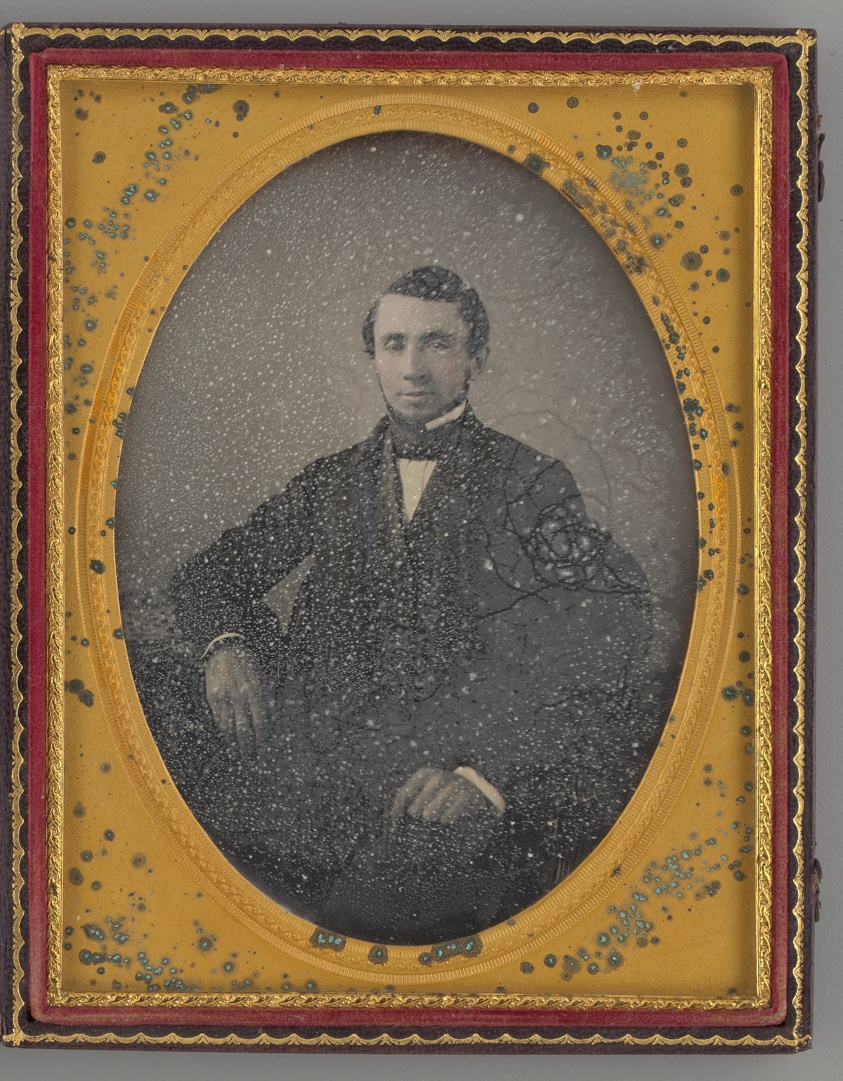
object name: Photograph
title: Untitled (Portrait of a Man)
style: 19th century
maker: E. H. Hale (possibly L. H.); American, 19th century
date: 1855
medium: Daguerreotype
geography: United States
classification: portrait; photograph; photographic process; photography; portrait; daguerreotype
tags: lundberg collection, portraits